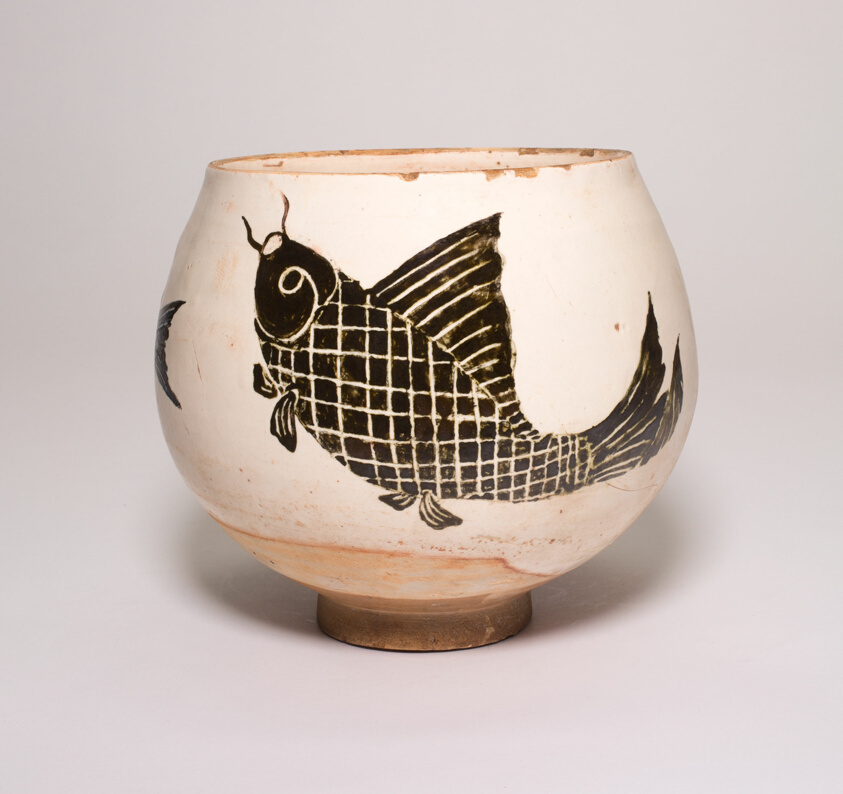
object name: Vessel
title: Bowl with Fish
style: Chinese (culture or style)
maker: China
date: Jin dynasty (1115–1234) or later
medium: Cizhou ware; slip-coated stoneware with underglaze iron brown painting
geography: China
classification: bowl; stoneware; dish (vessel); asian art; ceramics; vessel